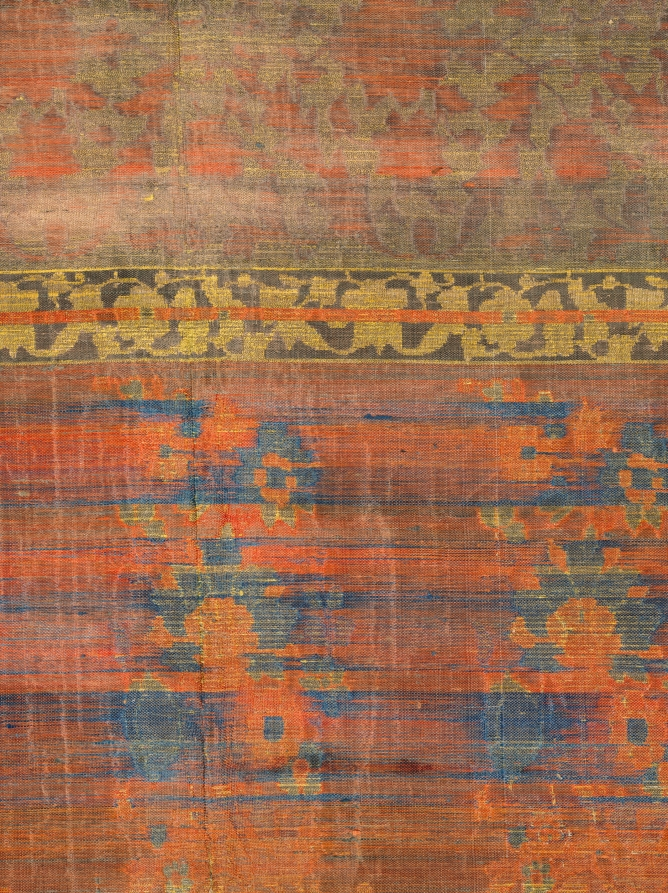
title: Velvet fragment from a palace curtain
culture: Iran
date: 1700s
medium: taquete silk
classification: Textile